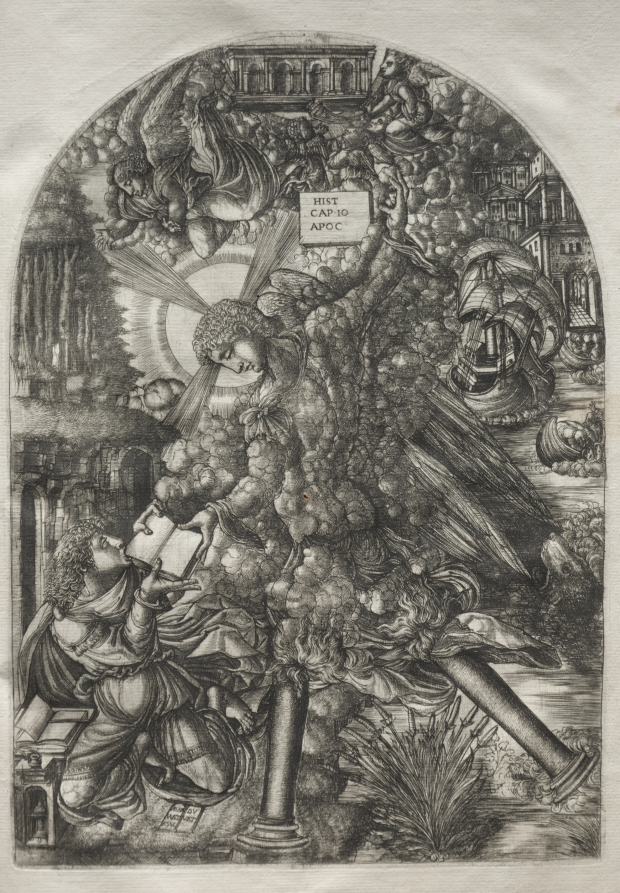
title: The Apocalypse: The Angel Gives St. John the Book to Eat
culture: France, 16th century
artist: Jean Duvet (French, 1485–1561)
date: 1546–1556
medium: engraving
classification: Print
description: This print is part of a bound volume of works illustrating the a narrative of the Apocalypse, taken from the Revelation of Saint John in the Bible. The 23 engravings in the series occupied the artist for a number of years and represent his greatest artistic achievement. The museum's volume is one of only seven known complete sets. Jean Duvet was one of the first major printmakers in France and one of the most original artists of the 1500s. Although he worked mostly in the provincial city of Langres, he became aware of Italian art through the circulation of prints—notably those of Marcantonio Raimondi. His solidly modeled human figures reflect the influence of the Italian High Renaissance. Duvet, however, developed an idiosyncratic, highly artificial style with crowded compositions that ignore rational space in favor of ornamental surface patterns.